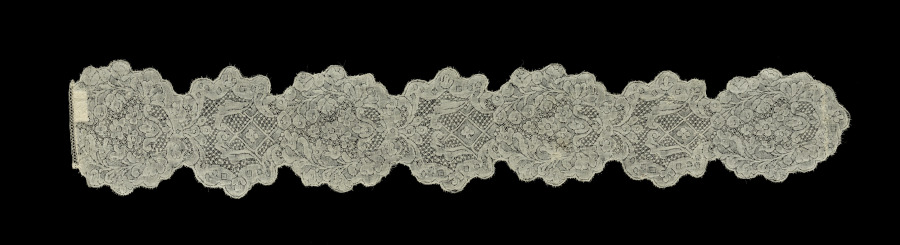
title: Lace Lappet (one of a pair)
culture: Belgium, Binche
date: 1700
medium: Linen: bobbin lace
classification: Lace